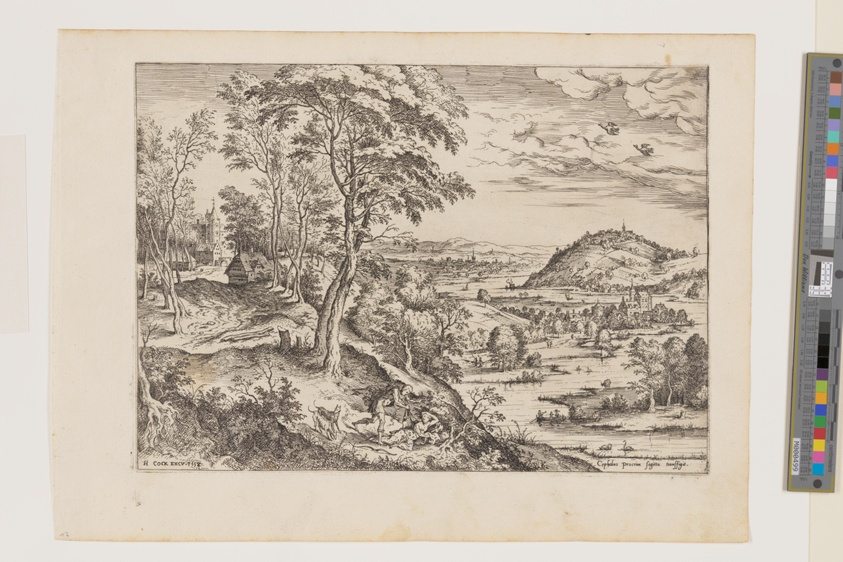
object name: Print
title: Cephalus and Procris, from Landscapes with Biblical and Mythological Scenes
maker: Hieronymus Cock (Netherlandish, c. 1510–1570); after Matthys Cock (Netherlandish, c. 1505-1548)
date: 1558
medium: Etching on ivory laid paper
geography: Netherlands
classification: etching; paper; print; prints and drawing